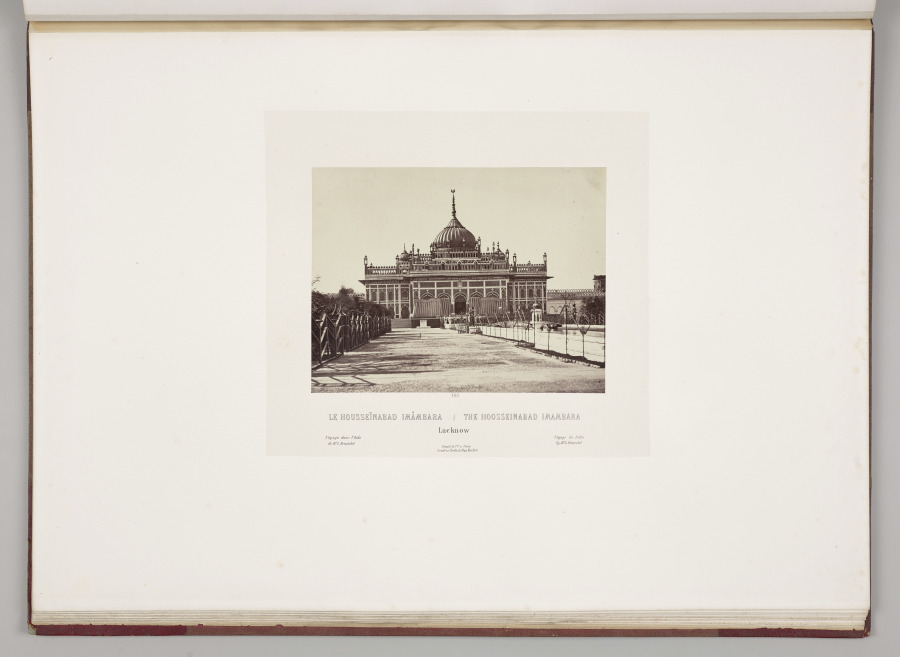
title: The Hoosseinabad Imambara, Lucknow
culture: France, 19th century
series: India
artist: Louis-Théophile Marie Rousselet (French, 1845–1929)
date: 1865–68, published 1869–70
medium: Albumen print from glass plate negative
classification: Photograph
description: Concerned that his drawings did not do justice to the splendor of India’s monuments, Rousselet learned photography in India that year, a remarkable accomplishment. He proved to be a talented photographer with a sophisticated sense of composition. The scenes in this volume sweep across sites of Sultanate, Rajput, and Mughal power in northern India, from the sacred Hindu city of Varanasi on the Ganges River to Alwar in Rajasthan. Also included are several scenes of industry and portraits of Indian rulers.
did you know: Louis Rousselet described himself as a “scientific traveler” when he went to India alone at age 18 in 1863 and stayed into 1868.